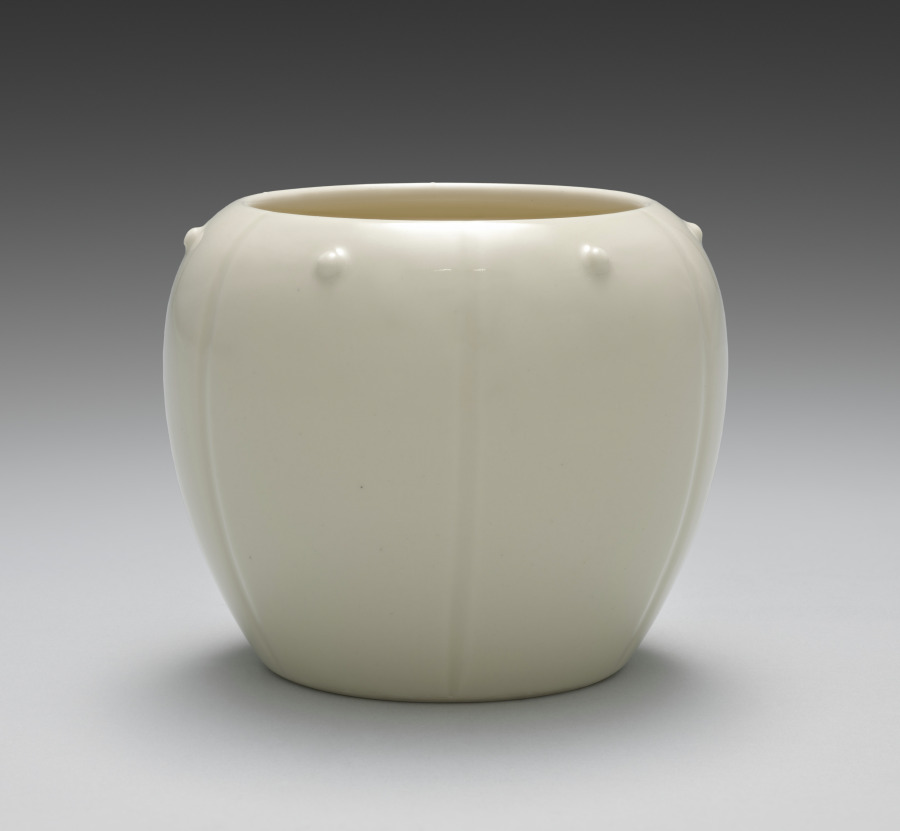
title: Container from Lit Charcoal and Ash Containers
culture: Japan, Meiji period (1868–1912)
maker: Seifū Yohei III (Japanese, 1851–1914)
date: 1893–1914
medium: One from a set of four containers; porcelain with molded design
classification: Ceramic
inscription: 清風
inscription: The storage box for this set is inscribed and impressed with seals.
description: The box lid for these six-lobed lit charcoal and ash containers, or hiire, identifies them as kōhakuji, another of Yohei III’s translucent cream colors over ivory clay bodies. One might translate the name as “lustrous pearl[–glazed ivory] porcelain.” A hiire was filled with ash with burnt coals at the center so that embers and tobacco ash could be discarded safely during a gathering. Each of the lobes on the containers has a round protrusion set below the rim. The studlike pattern is called ruiza. The term is also used to describe the pattern that rings the shoulder of some flower vases or metal kettles used in chanoyu.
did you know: The Seifu studio generally followed the standard practice in Japan for identifying the artist and object in box inscriptions.